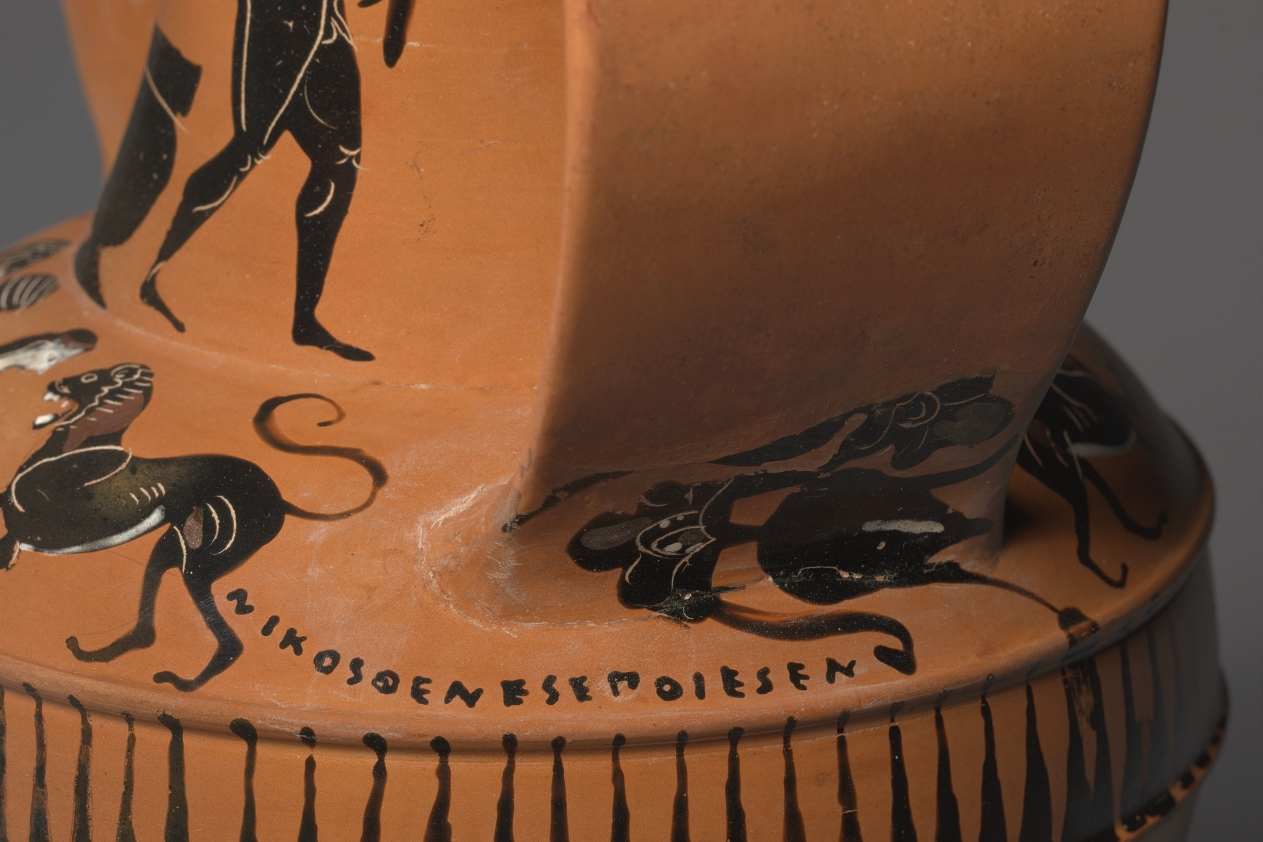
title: Black-Figure Nikosthenic Amphora (Storage Vessel): Dancing Youths; Sphinxes and Lions; Satyrs and Maenads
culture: Greek, Attic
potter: signed by Nikosthenes (Greek, Attic, active c. 545–510 BCE)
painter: attributed to Painter N, Thiasos Group (Greek, c. 530–510 BC)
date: c. 530–510 BCE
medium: ceramic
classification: Ceramic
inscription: inscription Under handle A/B:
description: The distinctive shape of this amphora—wide strap handles, conical neck, and ribs running around the upper body—is a trademark of the potter Nikosthenes, who signed his name below the partially restored handle (together with the verb EPOIESEN, for “made”). Nikosthenes signed nearly 150 surviving vases, more than any other named potter or vase-painter. Made in Athens with an Etruscan clientele in mind, Nikosthenic amphorae emulate precious metal and ceramic bucchero vases made in Etruria (central Italy), where many examples have been discovered. The painted figures include dancing youths (on the neck), sphinxes between lions (on the shoulder), and a continuous procession of dancing satyrs alternating with women (on the body).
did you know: The painter of this vase decorated nearly every available surface; the undecorated handle section is modern.